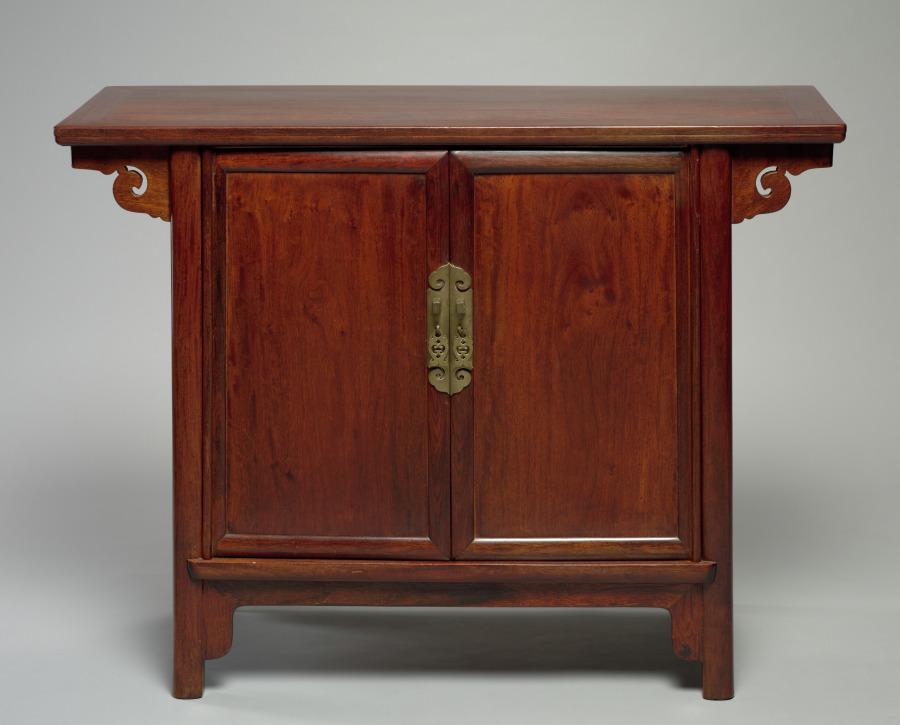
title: Table Top Cupboard: Gui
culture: China, Ming dynasty (1368–1644)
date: 1500s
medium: Rosewood (huanghuali)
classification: Furniture and woodwork